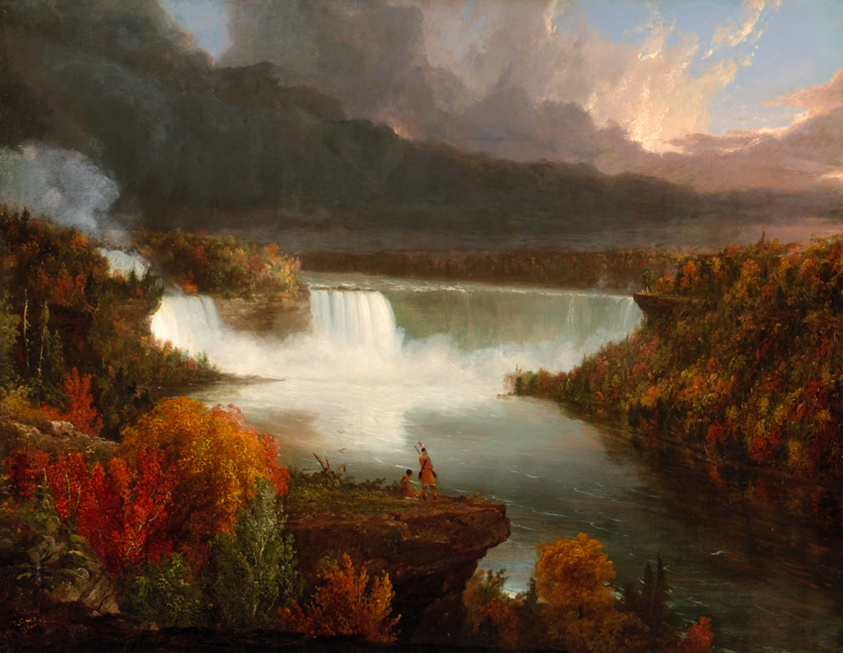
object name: Painting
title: Distant View of Niagara Falls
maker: Thomas Cole (American, born England, 1801–1848)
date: 1830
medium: Oil on wood panel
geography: Niagara Falls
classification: painting; american arts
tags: landscapes